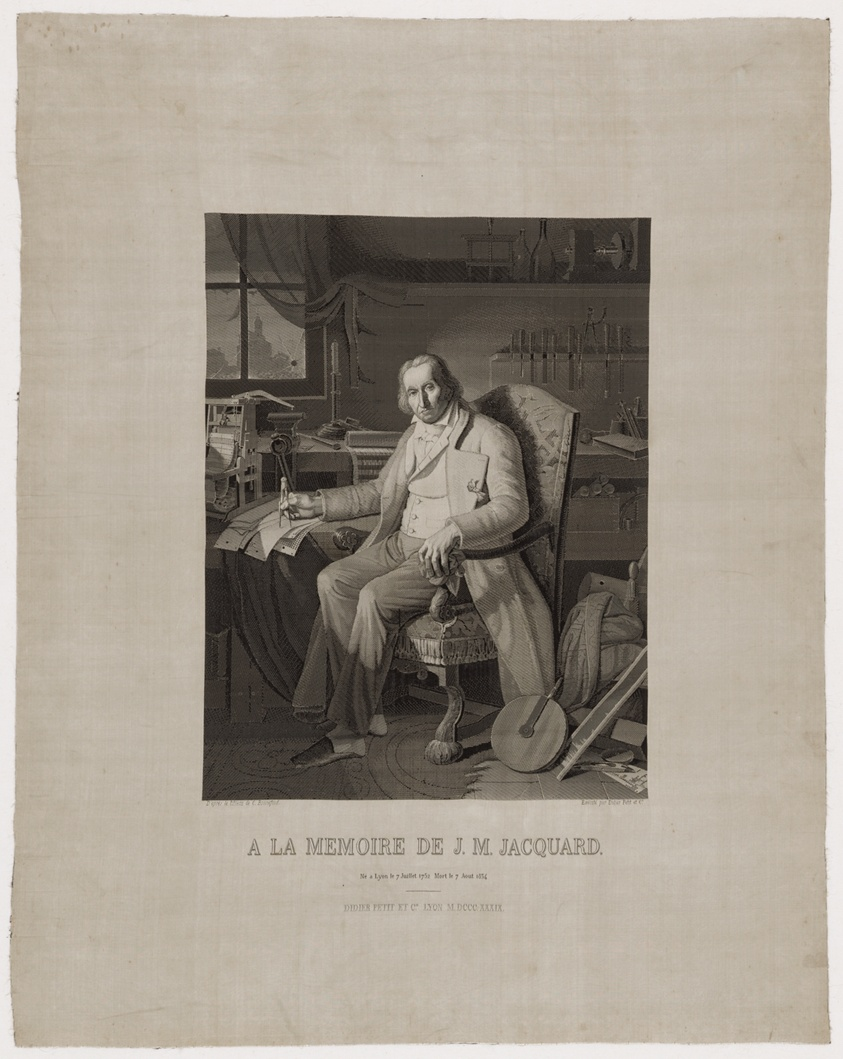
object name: Textile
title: Portrait of Joseph Marie Jacquard (1752–1834)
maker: After a painting and engraving by Jean-Claude Bonnefond (French, 1796–1860); Woven by Carquillat (French, 1803–1884); Produced by Didier Petit et Cie; France, Lyon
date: 1839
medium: Silk, plain weave with plain interlacings of secondary binding warps, patterning wefts and self-patterning ground wefts; woven on loom with Jacquard attachment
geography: Lyon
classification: textile; weaving